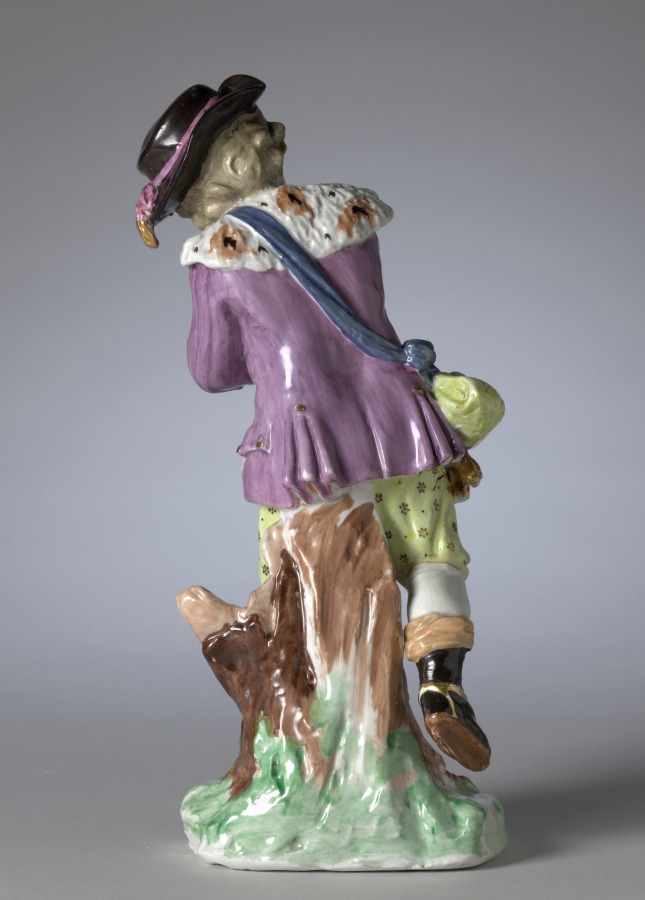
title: Figure of Winter from the Four Seasons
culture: England, Bristol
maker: Bristol Porcelain Factory (British, 1770–81)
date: c. 1775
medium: hard-paste porcelain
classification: Ceramic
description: The modern notion of childhood as a time of innocence and simplicity emerged during the second half of the eighteenth century. This understanding of adolescence led to numerous depictions of children as personifications of the four seasons. Here winter is portrayed as a young boy wearing ice skates, a fur-lined jacket, and a hat adorned with holly branches. In his satchel he carries a goose and rabbit, both of which are commonly hunted in the winter.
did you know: Allegorical figures most often decorated a table during the dessert course, providing amusing subjects for conversation.